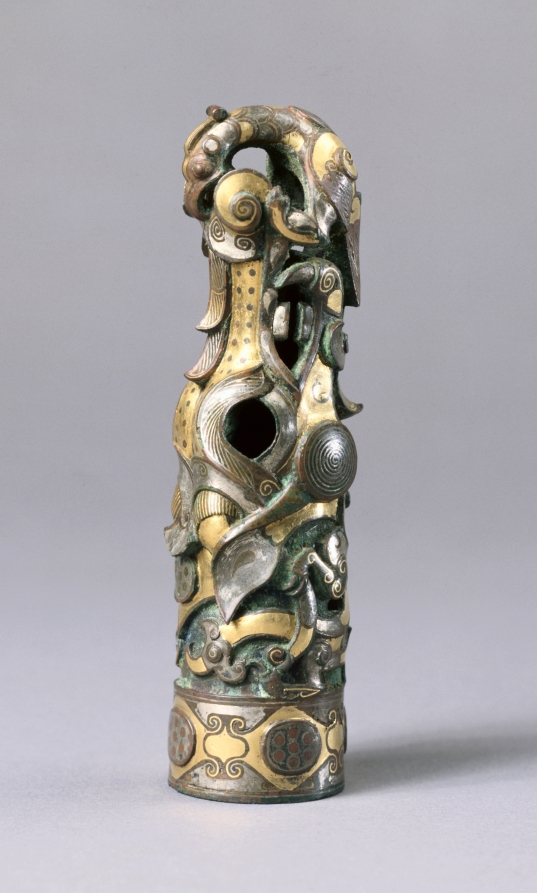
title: Finial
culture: China, Henan province, Jincun, Warring States period (475–221 BCE)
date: 475–221 BCE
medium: bronze inlaid with gold and silver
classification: Metalwork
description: Chariots and weapons were associated with hunting and warfare in the ancient world. Those bronze fittings with lavish inlaid decoration were status symbols of rulers and high-ranking officials. This finial combines extravagance and ferocious beauty to reveal the aesthetics of the time. The birds with hooked beaks are above the intertwined serpent-dragons. Such artistic conception emphasizes the power of the bird in combat. Every facet of this finial is exquisitely crafted to give full play to the inlaid decoration.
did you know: This finial is made to be placed on the top of a pole or staff.